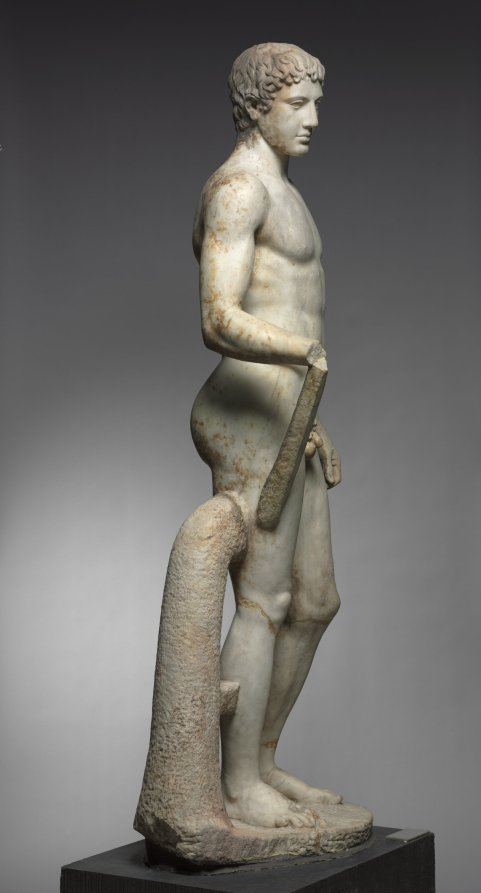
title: Statue of an Athlete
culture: Italy, Roman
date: 1–100 CE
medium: marble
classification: Sculpture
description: This idealized athlete recalls Greek sculptural types invented and popularized during the 400s BC. Large-scale athletes and other sculptures like this were originally created by famous artists as sanctuary dedications. Centuries later, they were widely copied and adapted by Roman sculptors, whose clients sought their own versions of earlier masterpieces. Working in marble rather than bronze, these sculptors added certain elements for stability, such as the struts and the large tree trunk beside the right leg here. Sculptures like this one are profoundly complex, made by and for Romans but descended from Greek ancestors.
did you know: For many years, this sculpture stood in the rotunda of the Cleveland Museum of Art.